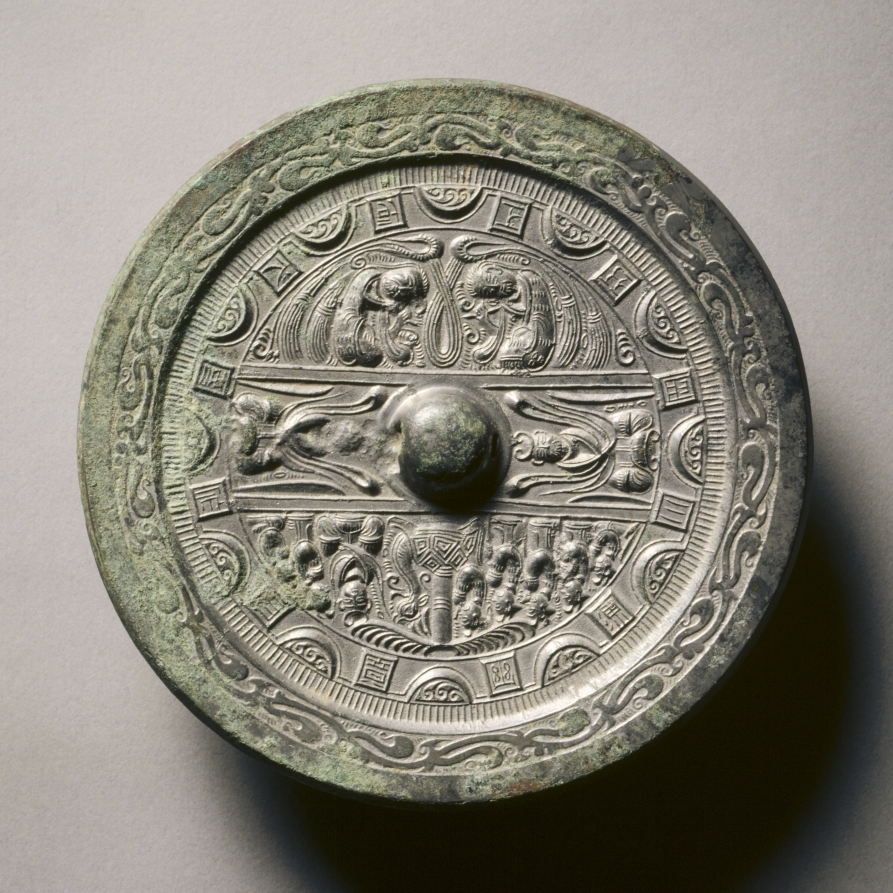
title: Mirror Featuring Deities and Kings in Three Sections Surrounded by Rings of Squares and Semicircles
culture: China, Eastern Han dynasty (25–220 CE)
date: 175–225 CE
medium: bronze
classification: Metalwork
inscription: 吾作明鏡，幽涑三岡。巧工刻之。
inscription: 余造明【鏡】，【】【】能容 。翠羽秘蓋， 靈鵝臺【】。雕刻神圣，西母東王。 堯帝賜舜二女，天下泰平...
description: Inscription: I made this bright mirror By refining the three metals. With my fine skill, I engraved [the design].